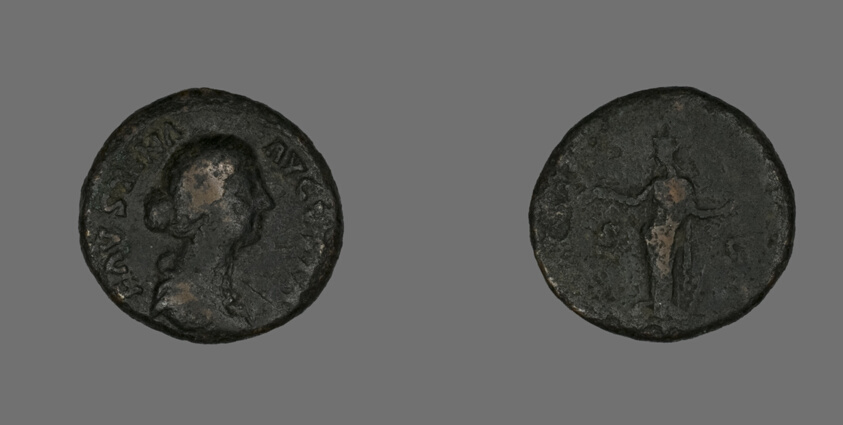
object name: Coin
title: As (Coin) Portraying Empress Faustina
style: roman (ancient, style or period)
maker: Roman, minted in Rome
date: 161-176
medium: Bronze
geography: Roman Empire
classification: coin; ancient art